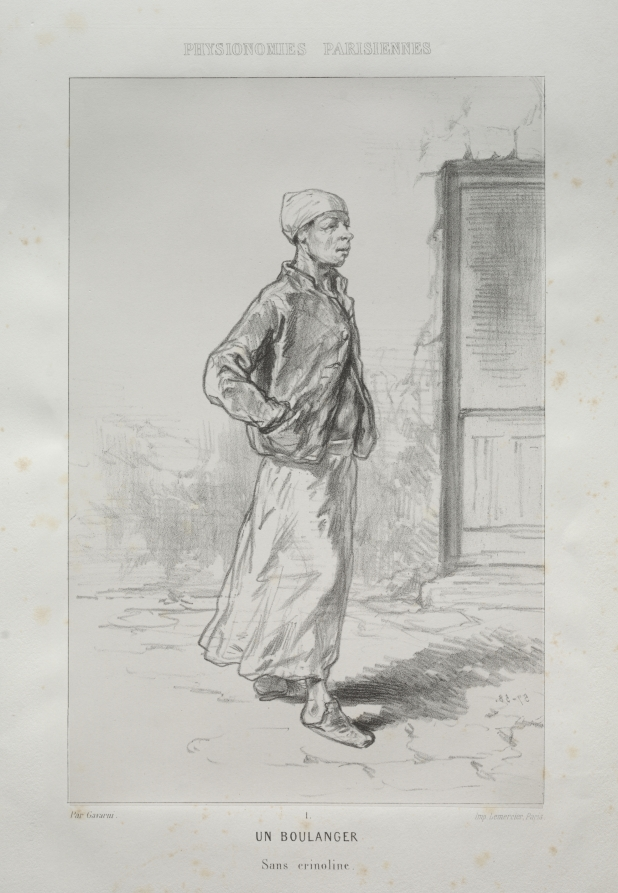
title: Un Boulanger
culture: France, 19th century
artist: Paul Gavarni (French, 1804–1866)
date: 1857–58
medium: lithograph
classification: Print